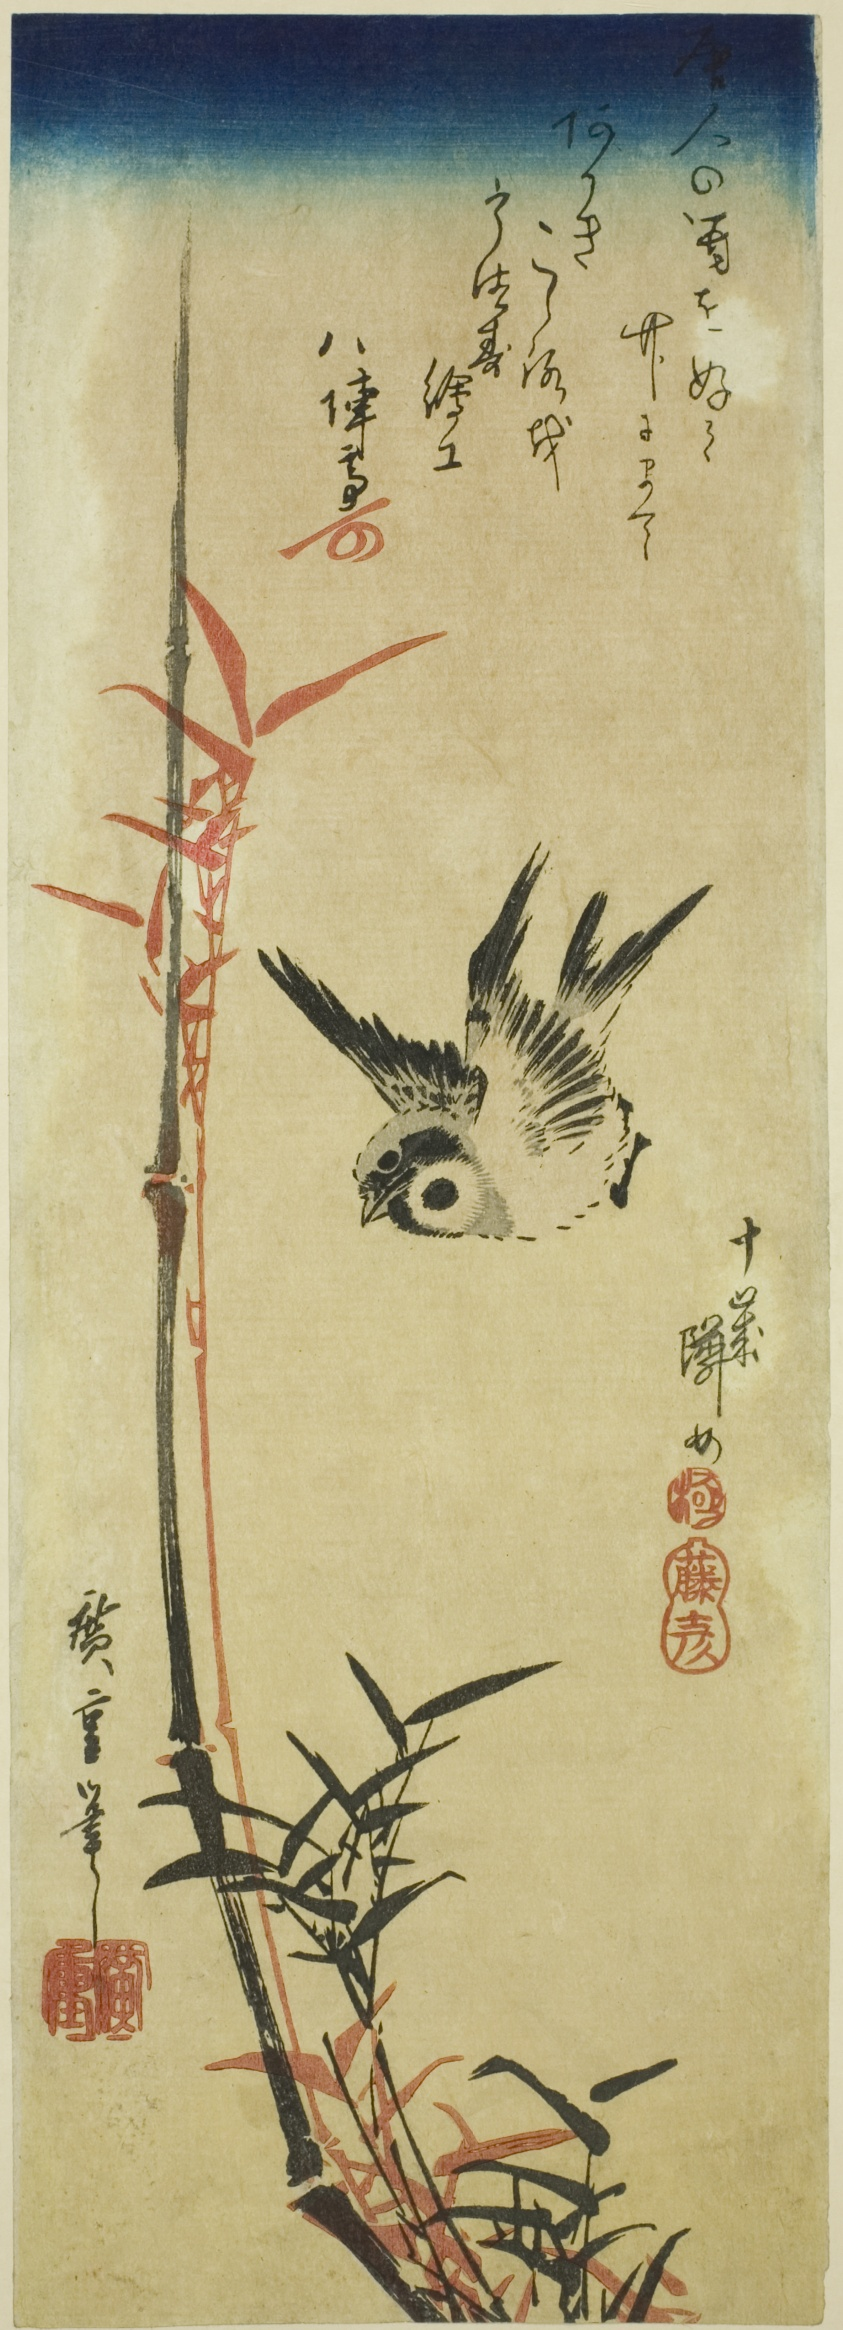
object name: Print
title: Sparrow and bamboo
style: Japanese (culture or style)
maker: Utagawa Hiroshige 歌川 広重; Japanese, 1797-1858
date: mid–1830s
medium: Color woodblock print; chutanzaku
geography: Japan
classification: woodblock print; print; asian art